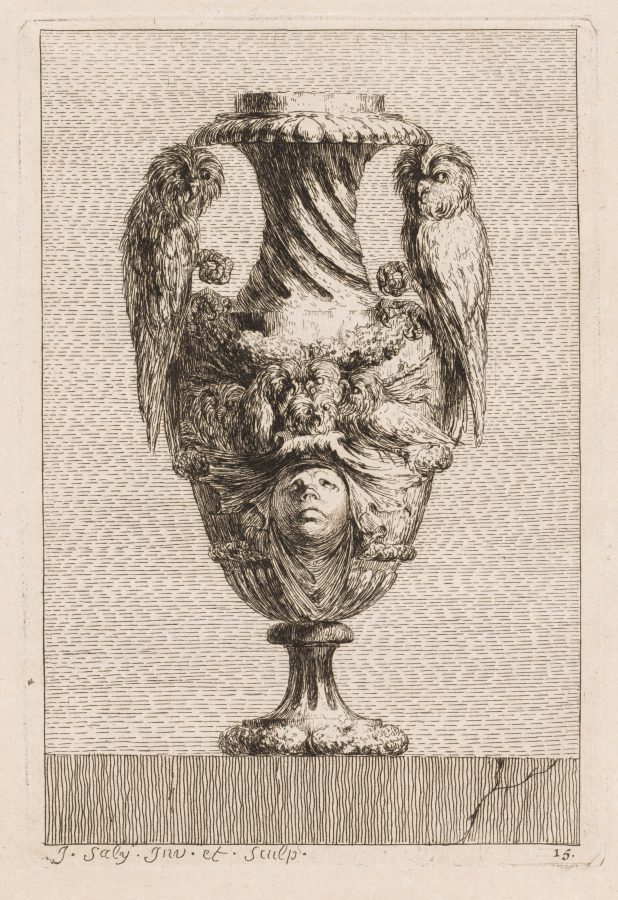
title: Suite of Vases: Plate 15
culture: France, 18th century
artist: Jacques François Saly (French, 1717–1776)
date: 1746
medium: etching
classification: Print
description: Trained as a sculptor, Saly etched a series of 30 vase designs while studying at the Académie de France in Rome. After his return to Paris, the publication announcement for the Suite of Vases endorsed the prints as an indication of the sculptor’s ingenuity and freedom of design. The vase designs also nourished an appetite for the revival of classical elements, or Neoclassicism, in decorative arts that developed in the mid-18th century.